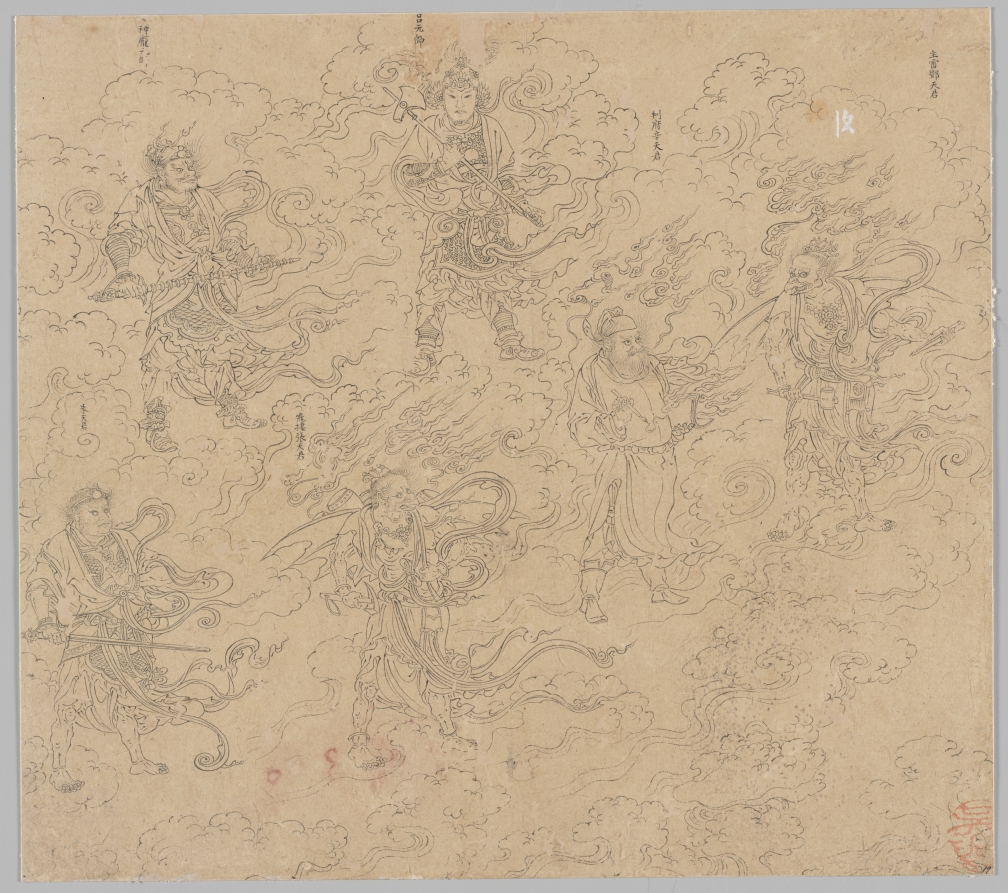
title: Album of Daoist and Buddhist Themes: Procession of Daoist Deities: Leaf 19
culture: China, Southern Song dynasty (1127-1279)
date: 1200s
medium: album, ink on paper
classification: Painting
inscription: 主雷鄧天君; 判府辛天君; 呂元帥; 飛捷張天君; 朱天君; □神龐元帥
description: This leaf is part of an important album of 50 drawings encompassing three subjects: processions of Daoist deities to the celestial spheres, the Ten Kings of Hell, and Erlang’s Campaign to Rid Mount Guankou of Dangerous Beasts (soushan tu 搜山圖). This section of the Daoist pantheon features, in the lower row from left to right, the Heavenly Lords Zhu Yanshi 朱彥矢, Zhang An 張安, Xin Jiang 辛江, and Deng Cheng 鄧成. Depicted in the upper row from left to right are the Field Marshals Peng Qiao 龐喬 and Lu 呂元帥 . Their names are inscribed above each figure.